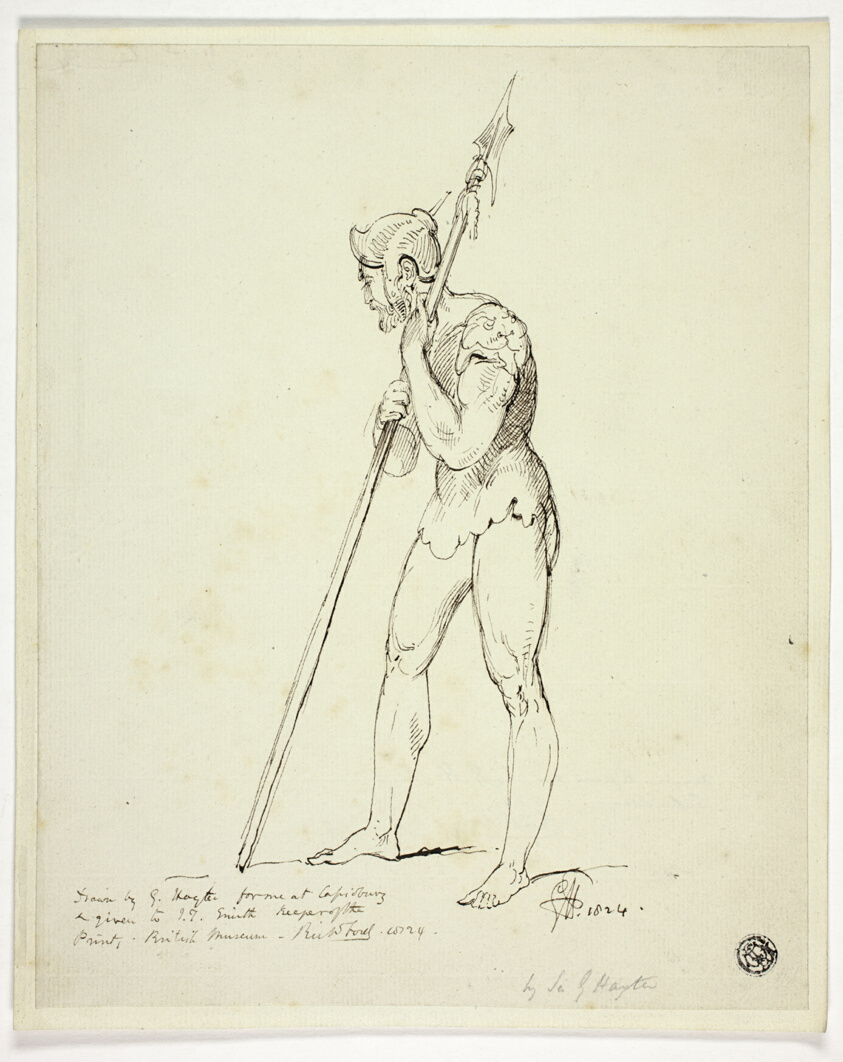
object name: Drawing and Watercolor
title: Standing Man in Armour Holding Lance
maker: George Hayter (English, 1792-1871)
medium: Pen and brown ink, on ivory laid paper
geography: England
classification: pen and ink drawings; drawings (visual works); prints and drawing